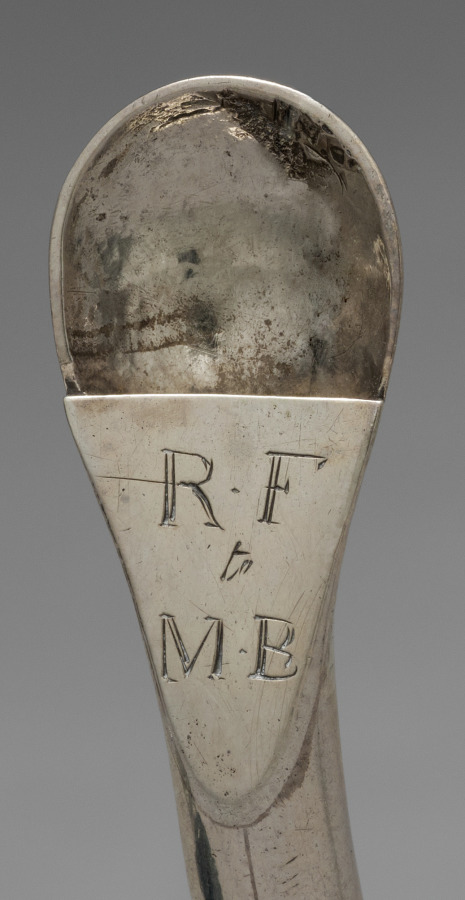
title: Feeding Tube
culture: America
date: 1700s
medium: silver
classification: Silver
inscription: "R.F/to/M.B" in block letters.